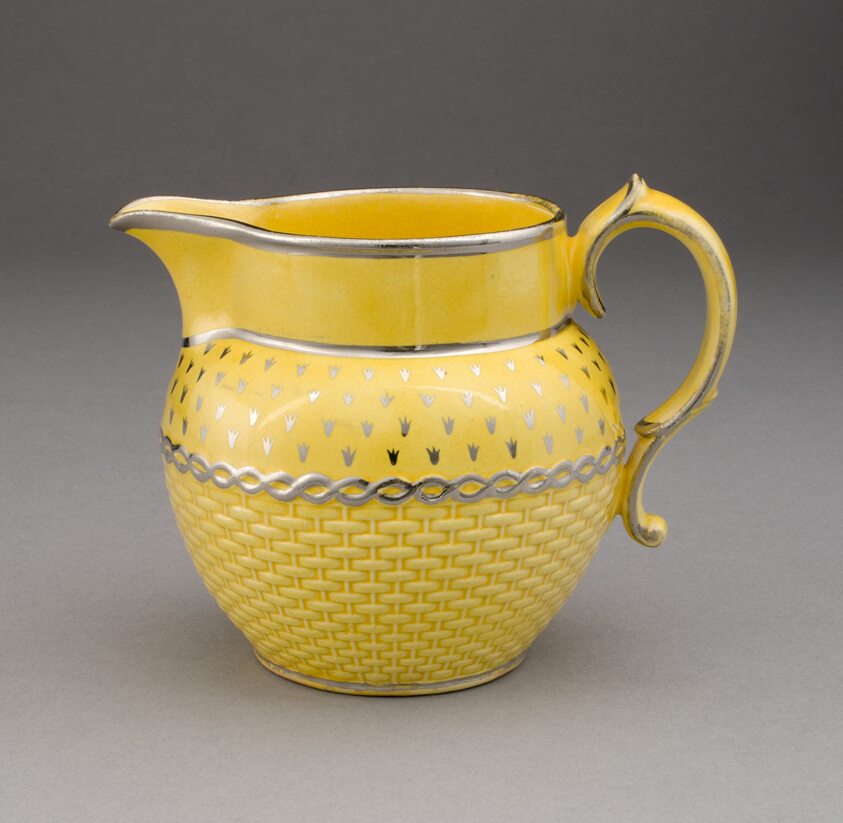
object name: Ceramics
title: Pitcher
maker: England, Staffordshire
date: 1820/30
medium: Lead-glazed earthenware with lustre decoration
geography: Staffordshire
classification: pitcher (vessel); earthenware; vessel; european decorative arts; ceramics